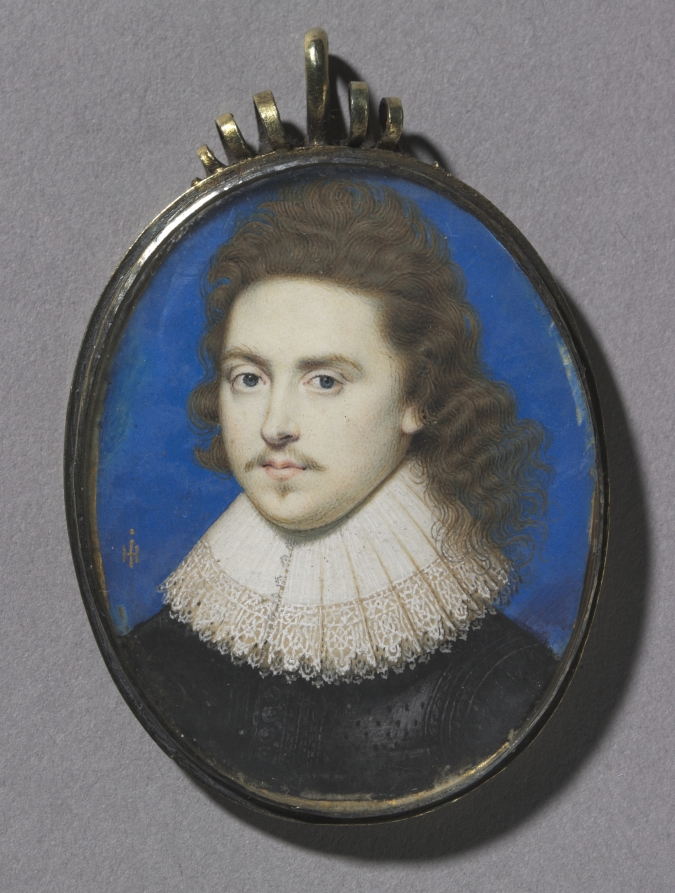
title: Portrait of a Man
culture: England, 17th century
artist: John Hoskins (British, c. 1590–1665)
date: c. 1625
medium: watercolor on vellum with gold border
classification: Portrait Miniature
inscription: signed left: IH [monogram]